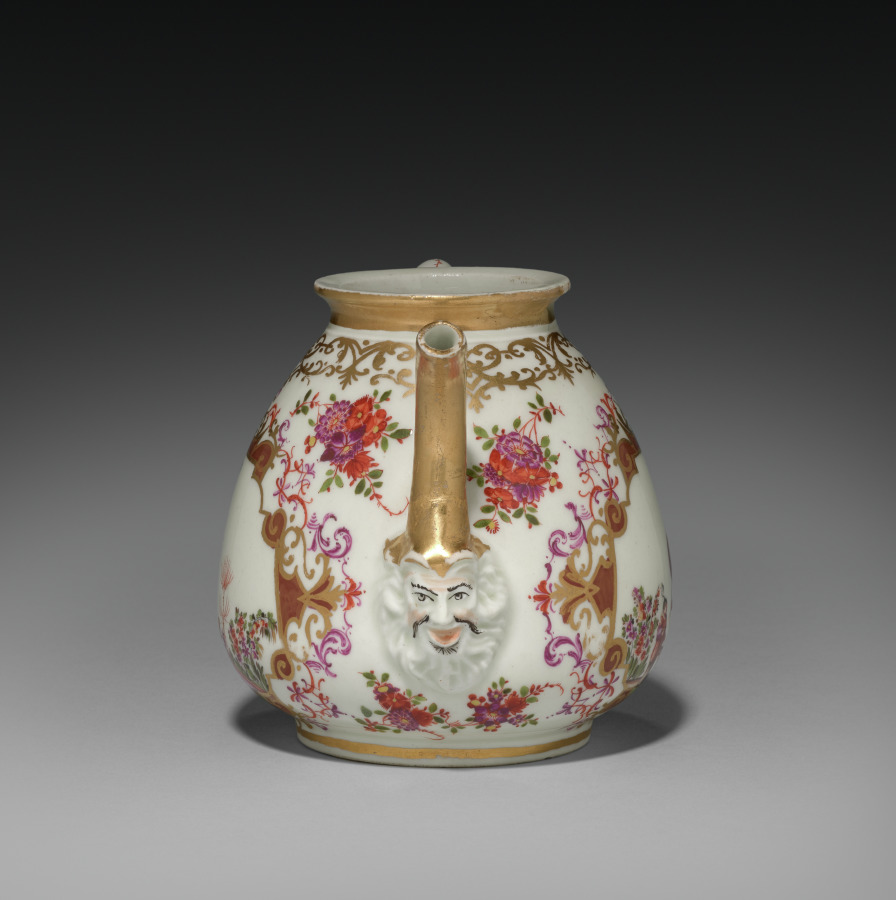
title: Tea Pot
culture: Germany, Meissen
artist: Meissen Porcelain Factory (German, est. c. 1710)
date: c. 1723–24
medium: gilt porcelain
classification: Ceramic